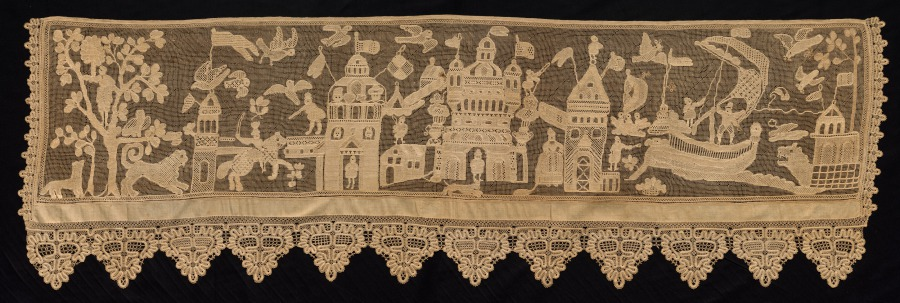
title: Lace Border with Battle Scene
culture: Russia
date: 1700s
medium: Linen; needle lace (cutwork and drawnwork), straight (continuous) bobbin lace, (tape lace) edging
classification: Lace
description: This valance, a decorative drapery made for attachment at the frame of the bed, was a typical object from the dowry of a bride in eighteenth and nineteenth-century Russia. The valance would have been made for the wedding night of a newlywed couple. The elaborate battle scene rendered in this lace is unusual and exceptional.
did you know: Handmade lace for marriage dowries was produced in large quantities in Russia during the eighteenth and nineteenth centuries.